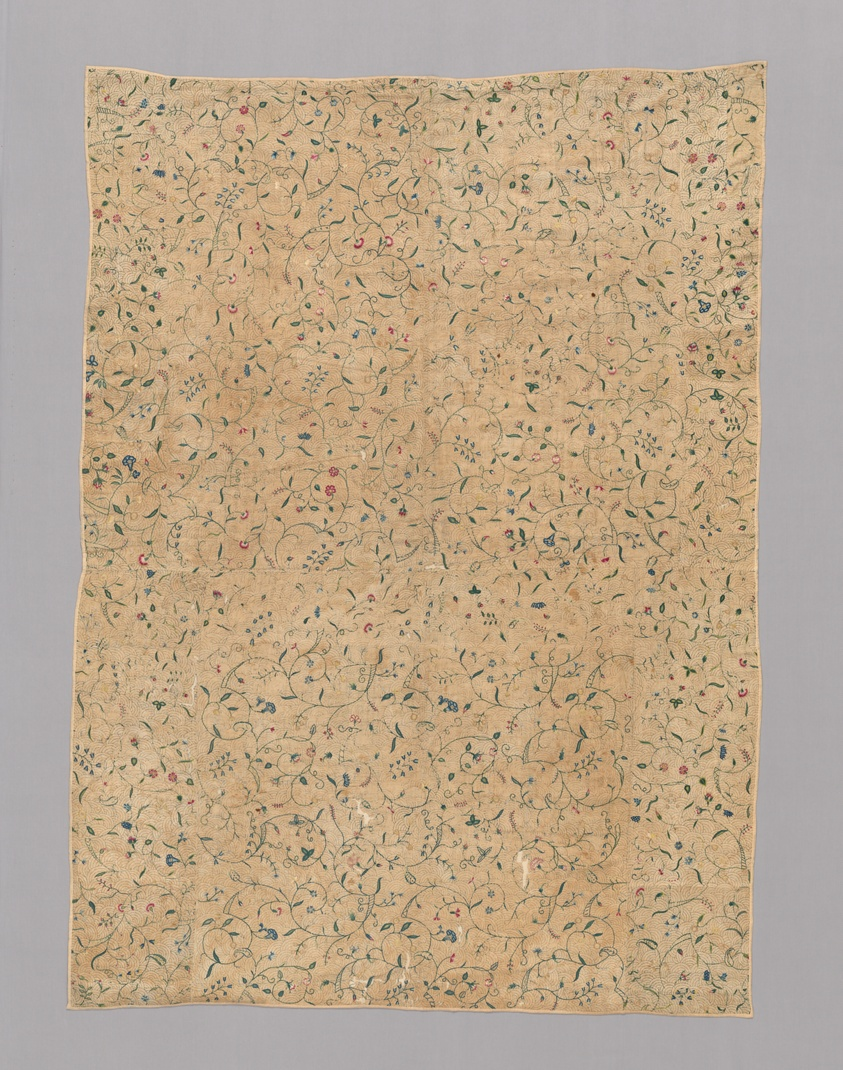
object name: Textile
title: Panel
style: queen anne, stuart, european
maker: England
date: Queen Anne period (1702–1714), 1700/25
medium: Linen, plain weave; embroidered with silk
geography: England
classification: textile; needlework (visual works)